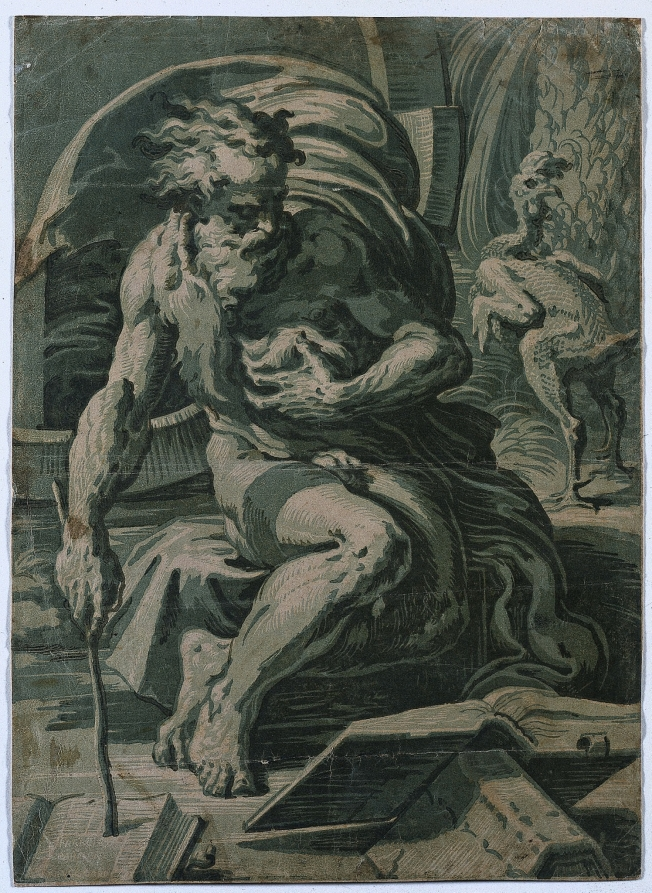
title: Diogenes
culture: Italy, 16th century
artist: Ugo da Carpi (Italian, c. 1479–c. 1532)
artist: after Parmigianino (Italian, 1503–1540)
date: c. 1524–27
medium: chiaroscuro woodcut (in four shades of green)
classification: Print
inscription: lower left, in block: FRANCISCVS / PARMEN· / PER·UGO CARP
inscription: verso, upper center, in graphite: Sadeler 1757 / N° 4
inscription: upper right, in graphite: 10376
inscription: across center, in pen and brown ink: N 13 [t?]alla[nf?]o [I.vinton?] [entire inscription is upsidedown]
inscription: lower left, in graphite: hos[...3--3--.]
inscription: lower left, in pen and brown ink: [illegible monogram]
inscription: lower left, in graphite: H. de Carpo after Parmesan / Diogenes B XII p.100.10;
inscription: lower right, in graphite: [illegible]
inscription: lower right, in graphite: mp[n...?]/2250[the'50' is smaller, raised, and underlined]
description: Diogenes was a Greek philosopher who lived during the 300s BC. The bird in the background alludes to his cynical response to Plato, who had described man as a featherless biped. Diogenes plucked a rooster and brought it to Plato’s school, exclaiming, “Here is Plato’s man!” Ugo da Carpi was influential in the development of the chiaroscuro woodcut in Italy. The term chiaroscuro combines the Italian words chiaro (light) and scuro (dark). Invented to emulate drawings with light and dark pigments on tinted paper, the printing technique uses multiple woodblocks to layer different tones of color. This example, considered a masterpiece of Renaissance printmaking, uses four shades of green to render tonal values; the paper provides the lightest color in the composition.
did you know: In his Lives of the Artists (1550), Giorgio Vasari described Diogenes twice, praising it as Ugo da Carpi's most accomplished and beautiful print.